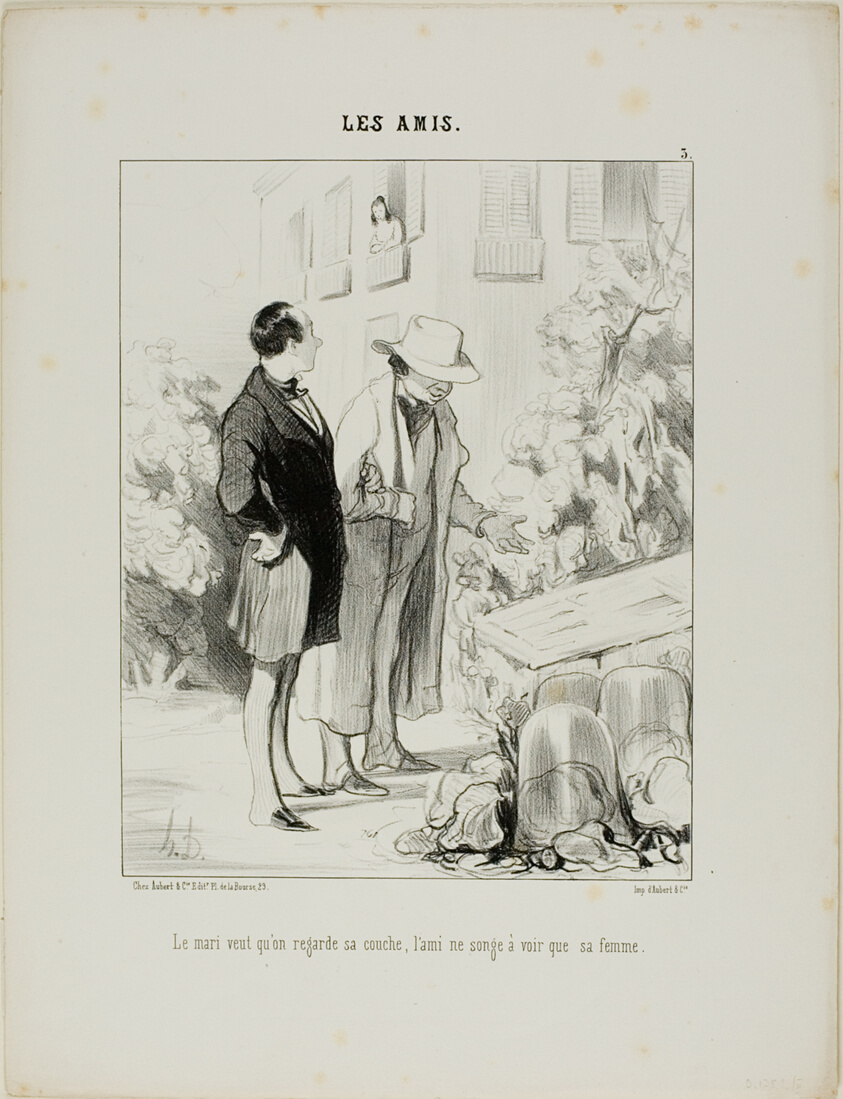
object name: Print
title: The husband wants him to look at his hot-bed, the friend only dreams of seeing his wife, plate 3 from Les Amisa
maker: Honoré Victorin Daumier; French, 1808-1879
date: 1845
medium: Lithograph in black on white wove paper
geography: France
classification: lithograph; print; prints and drawing